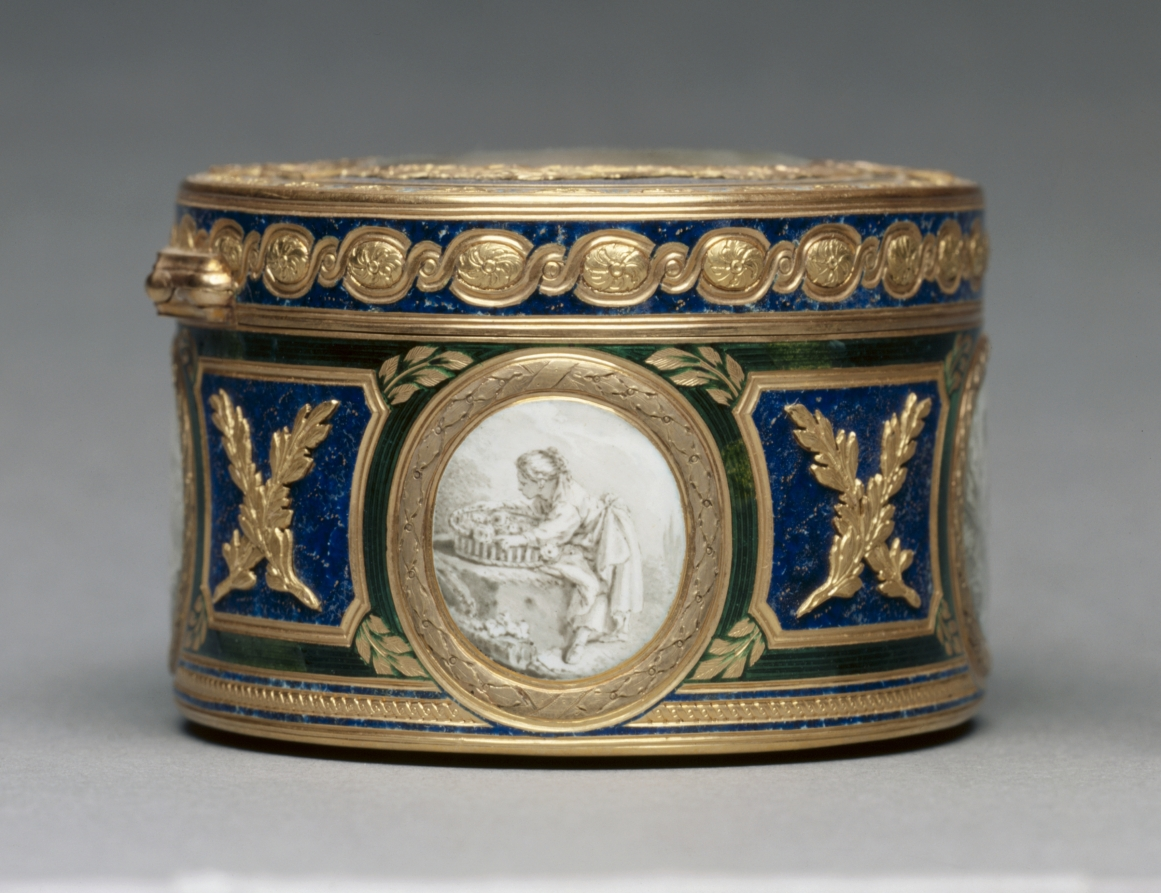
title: Snuff Box (Tabatière) with Portrait of Marie Antoinette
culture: France, 18th century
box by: Pierre-François-Mathis de Beaulieu (French)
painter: François Dumont (French, 1751–1831)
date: 1768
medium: watercolor on ivory in a gold and enamel box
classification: Enamel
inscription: [Maker's mark of Pierre-François-Mathis de Beaulieu, master goldsmith in 1768, inside cover]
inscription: [Charge mark of Jean-Jacques Prévot, 1762-1768, inside cover]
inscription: [Warden's mark of Paris, 1768-1769, inside cover]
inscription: [Discharge mark of Julien Alaterre, Paris, 1768-1774, on neck at right]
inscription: [Inside box, the letter]: "F"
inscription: [On bezel at left, engraved number]: "627"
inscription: [On front of bezel, engraved signature]: "Ve Georges Beaulieu à Paris"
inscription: [On right of miniature portrait, the letter]: "D"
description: This box was created through the collaboration of two skilled and well-known artisans of the period, master goldsmith Pierre-François-Mathis de Beaulieu and celebrated miniature painter François Dumont. The portrait of Marie Antoinette on the box's lid is painted in Dumont’s own style while those on the sides and bottom of the box take inspiration from the work of painter François Boucher, known for his pastoral scenes in the Rococo style.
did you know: Marie Antoinette, queen consort of French King Louis XVI and great patron of the decorative arts, was executed in 1793 at the end of the French Revolution.